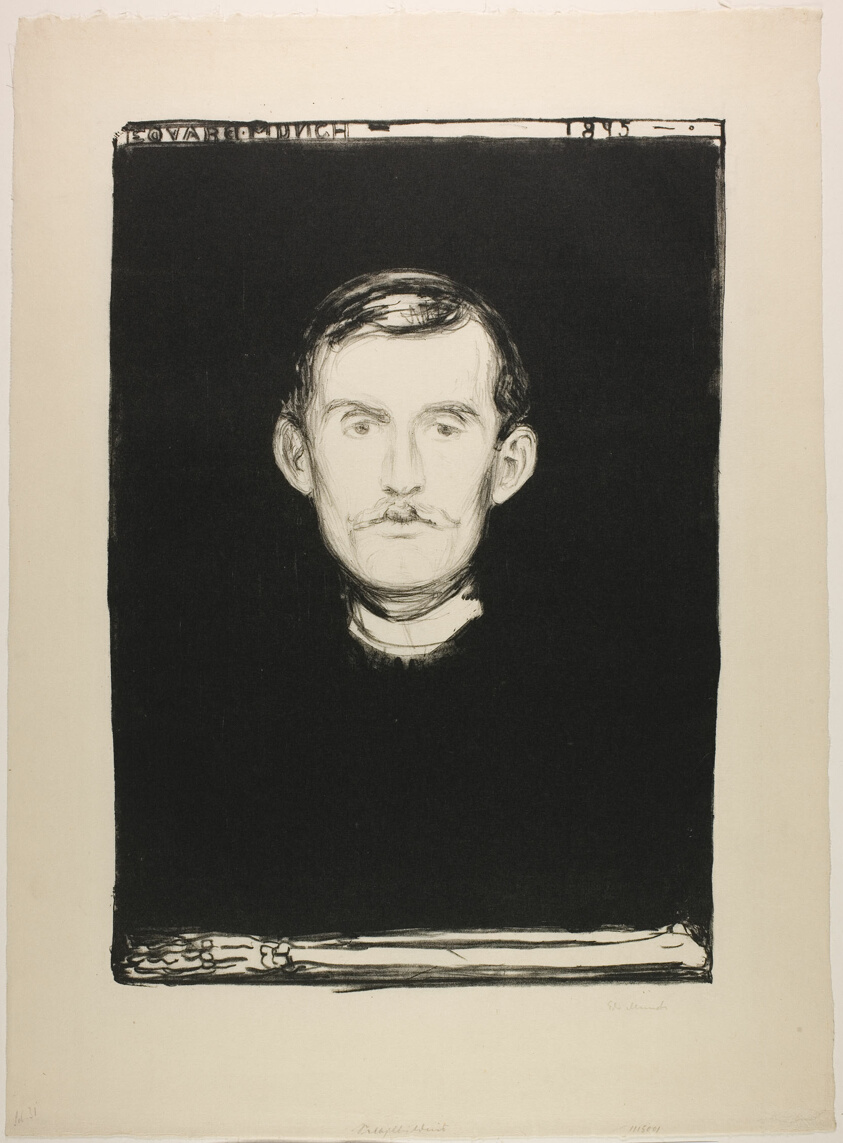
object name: Print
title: Self-Portrait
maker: Edvard Munch (Norwegian, 1863-1944); possibly printed by Nielsen Lassally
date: 1895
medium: Lithograph in black on ivory Japanese paper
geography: Norway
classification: lithograph; print; prints and drawing